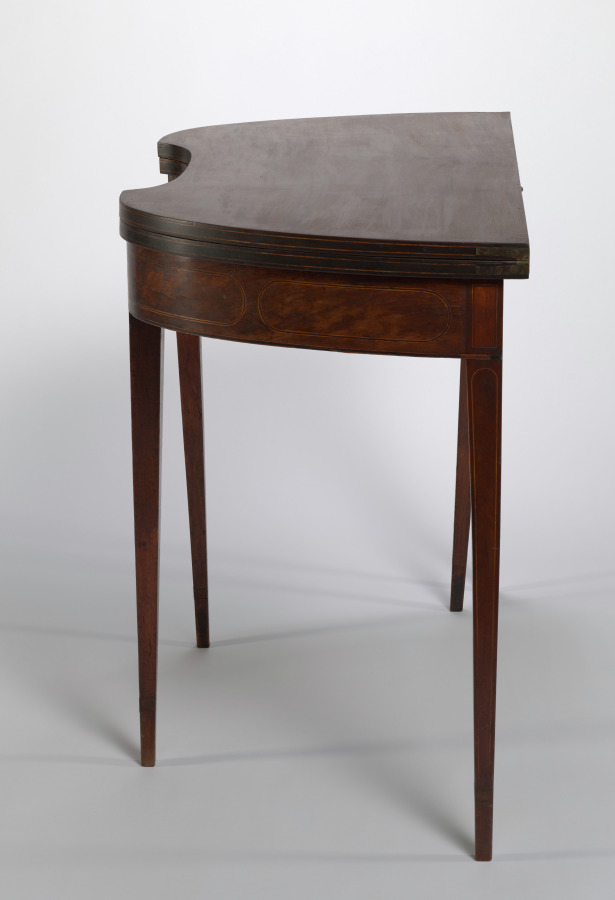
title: Game Table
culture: America, Maryland, Baltimore, early 19th Century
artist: style of George Hepplewhite (American, 1786)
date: c. 1800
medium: mahogany with inlays of various woods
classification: Furniture and woodwork